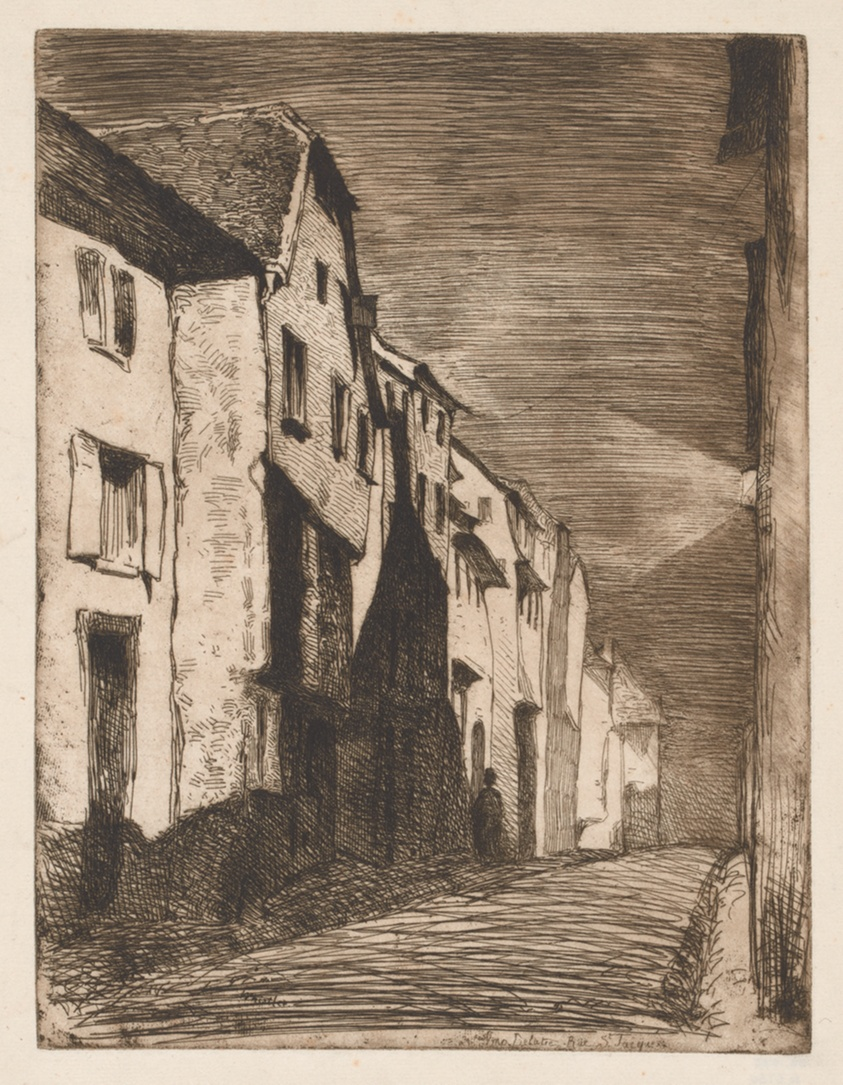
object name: Print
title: Street at Saverne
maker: James McNeill Whistler (American, 1834-1903)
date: 1858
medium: Etching with foul biting in dark brown ink on off-white laid paper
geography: United States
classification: etching; foul biting; print; prints and drawing; paper